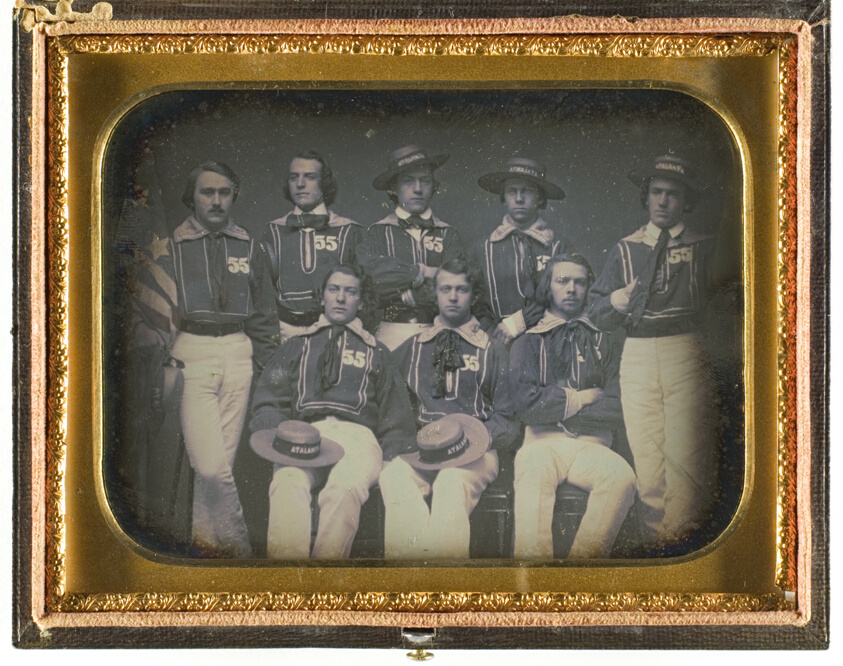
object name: Photograph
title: Untitled (Eight Atalanta Crewmen)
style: 19th century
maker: Artist unknown; American, 19th century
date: July 30, 1856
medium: Daguerreotype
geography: United States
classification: daguerreotype; photographic process; photography; photograph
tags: Collected by Hugh Edwards